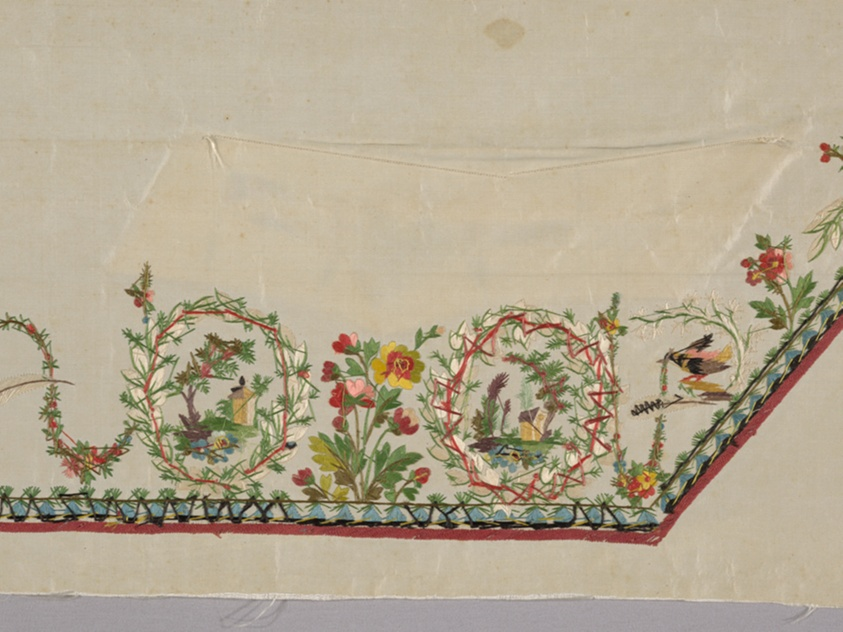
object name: Costume and Accessories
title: Embroidered Fabric for a Man's Waistcoat Front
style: 18th Century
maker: France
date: 1780s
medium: Silk, plain weave; embroidered with silk thread in individual back, outline, running, satin, split and stem stitches; couching; laid work and French knots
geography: France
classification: costume; needlework (visual works); waistcoat (garment); textile; costume - embroidery; needlework - costume; garment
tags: floral motifs, flowers, foliage, white (color), green (color), pink (color), building, floral, bird, wreaths, feathers, fashion, houses